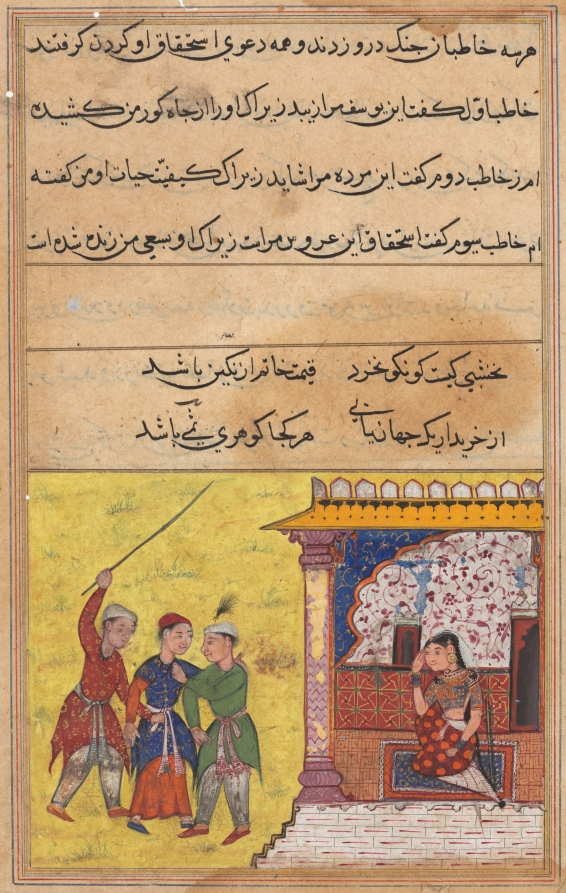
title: The three suitors again begin to quarrel among themselves for the hand of the devotee’s daughter, from a Tuti-nama (Tales of a Parrot): Twentieth Night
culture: Mughal India, court of Akbar (reigned 1556–1605)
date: c. 1560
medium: gum tempera, ink, and gold on paper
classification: Painting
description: After working together to revive the woman from her death-like illness, the three suitors resume their rivalry. The men brawl in the courtyard while she looks on from her chamber. Horrified by the behavior of her suitors, she renounces worldly matters, joins a temple, and devotes herself to serving god.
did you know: When the daughter joins the temple, she will shave her head and don woolen clothing.